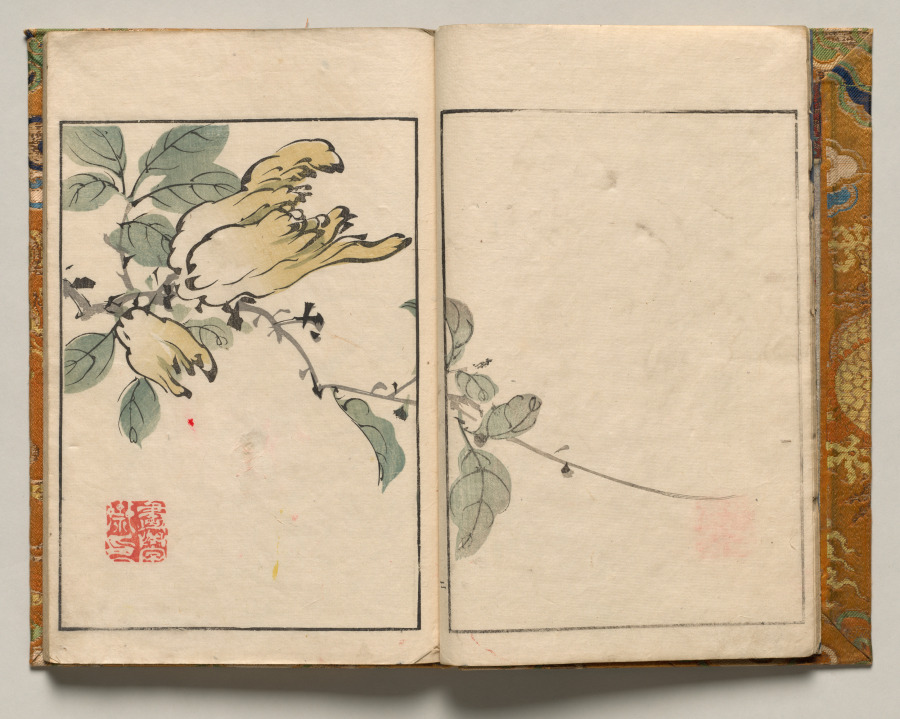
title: Buddha's Hand, Design Two from Shazanrō Picture Book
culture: Japan, Edo period (1615–1868)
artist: Tani Bunchō (Japanese, 1763–1841)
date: 1816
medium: Woodblock-printed book; ink and color on paper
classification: Bound Volume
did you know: Shazanrō was one of Tani Bunchō's style names.